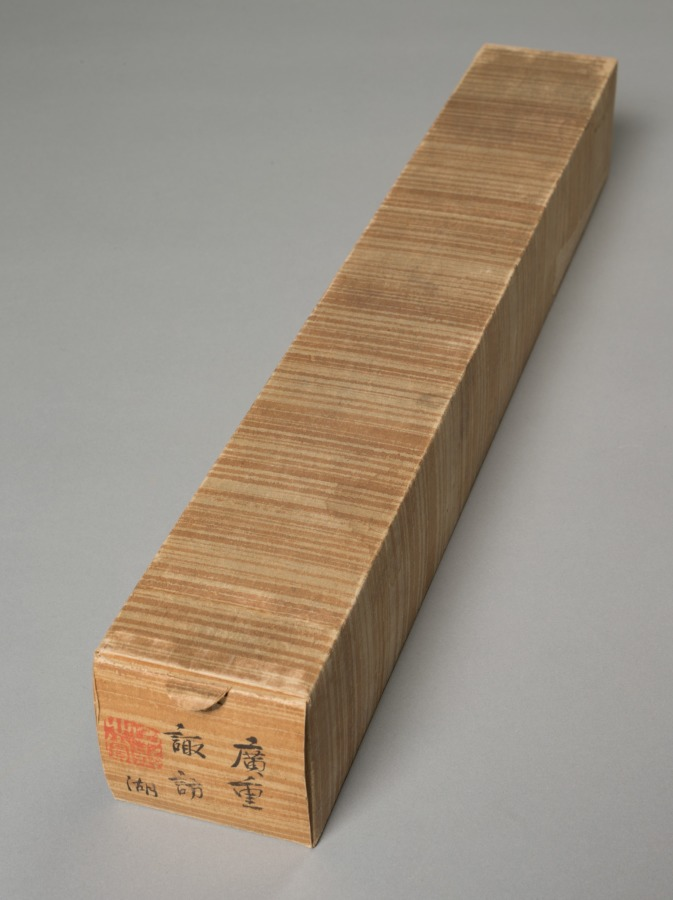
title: Lake Suwa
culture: Japan, Edo period (1615–1868)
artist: Utagawa Hiroshige (Japanese, 1797–1858)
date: c. 1832–58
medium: hanging scroll; ink and color on silk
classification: Painting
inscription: 立斎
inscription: 廣重